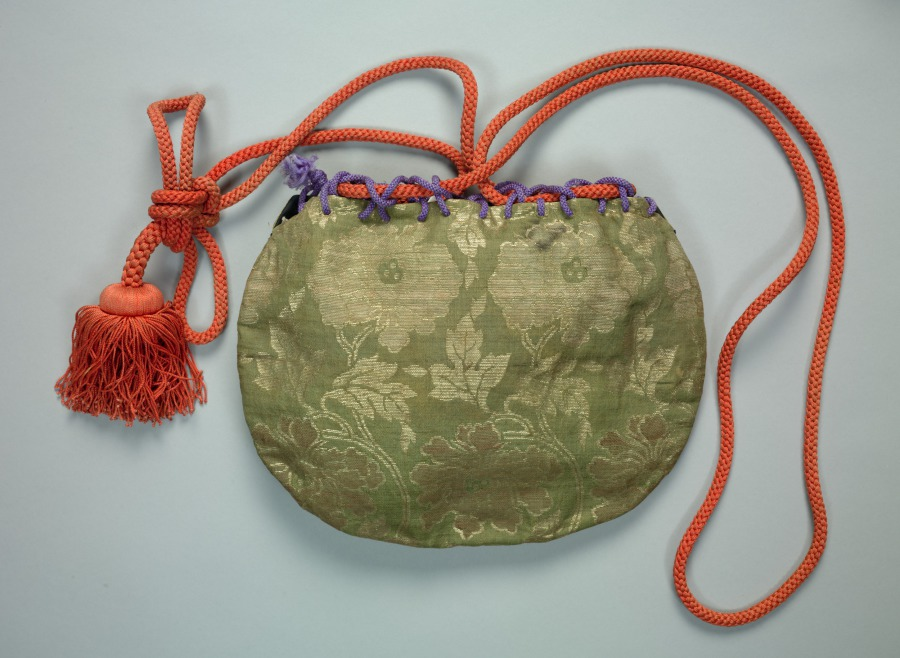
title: Bag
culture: Japan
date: 1700s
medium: Silk: brocaded with metal thread weft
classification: Garment